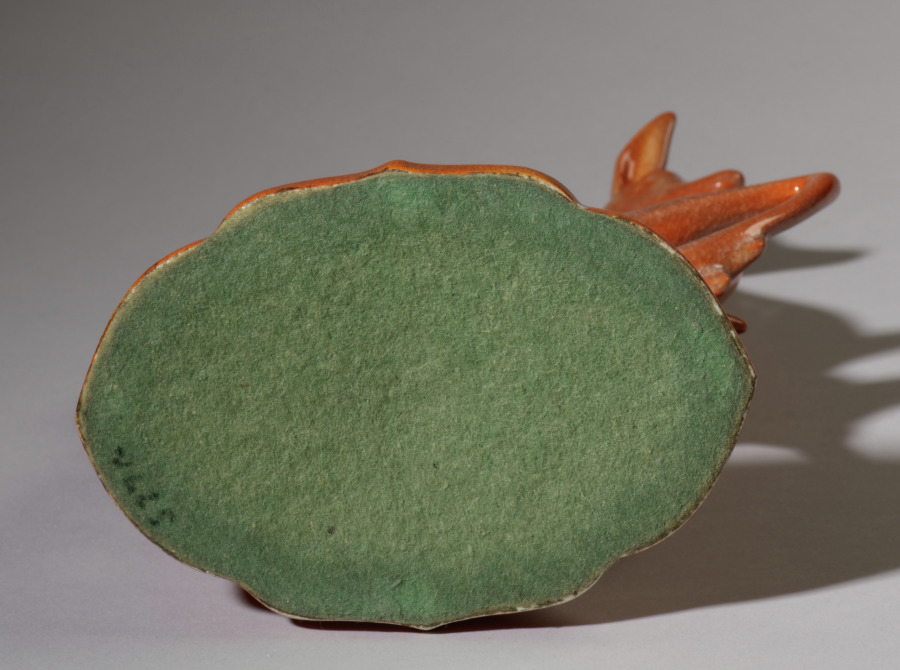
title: Fawn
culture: America, Ohio, Cleveland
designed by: Waylande Gregory (American, 1905–1971)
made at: Cowan Pottery Studio (America, Ohio, Rocky River, 1920–1931)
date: 1929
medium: earthenware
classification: Ceramic